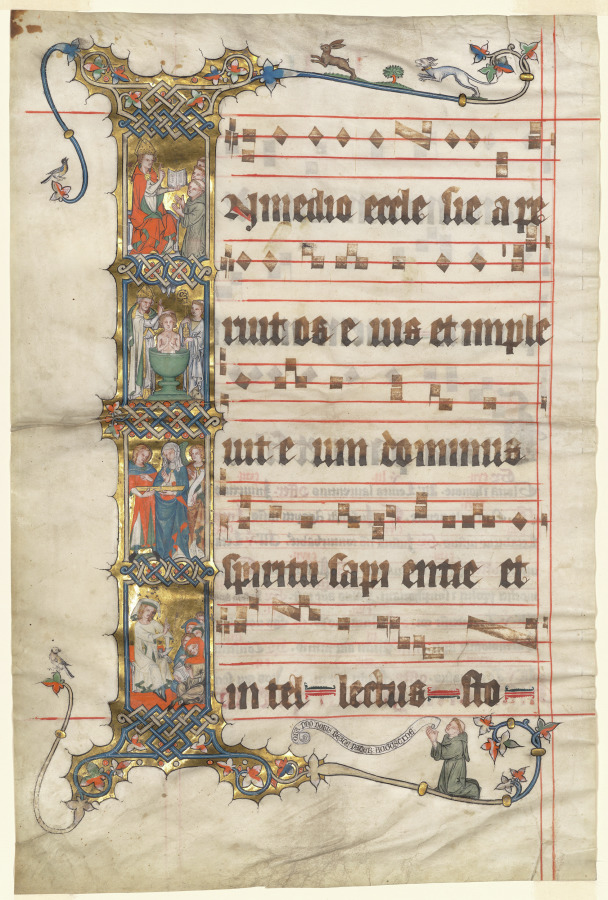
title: Leaf from the Wettinger Gradual: Historiated Initial (I) with Scenes from the Life of St. Augustine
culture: Germany, Lower Rhine (Cologne?), 14th century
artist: Second Master of the Wettinger Gradual (German)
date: c. 1330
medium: ink, tempera, and gold on parchment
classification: Manuscript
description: This imposing leaf comes from the monumental Wettinger Gradual preserved in the Canton Library in Aarau, Switzerland. The focus of the decoration consists of a single massive initial I. It is constructed with four separate compartments featuring scenes from the life of Saint Augustine. The compartments read (from top to bottom): Augustine teaching before his conversion; the dream of Augustine’s mother; Augustine’s baptism; and Augustine teaching monks. The monk in the lower margin holds a scroll that reads in Latin: “Pray for us, blessed Father Augustine.” The initial would have introduced the feast of Saint Augustine (August 28) in the Sanctorale: In medio Ecclesiae aperuit os eius (“And in the midst of the church she shall open his mouth”). Given the prominence of this initial within the gradual, and the depiction of an Augustinian canon in the lower marginal extender, the manuscript was likely produced for a community of Augustinians. Influenced by Parisian manuscript painting, the illuminators added tendril extenders supporting birds, animals, and, below, an Augustinian monk in prayer. Though nothing is known of their lives or careers, both artists have working styles related to Colognese manuscript and panel painting. It is probable that this leaf, and the parent codex from which it comes, would have originally belonged to an Augustinian religious foundation in Cologne.